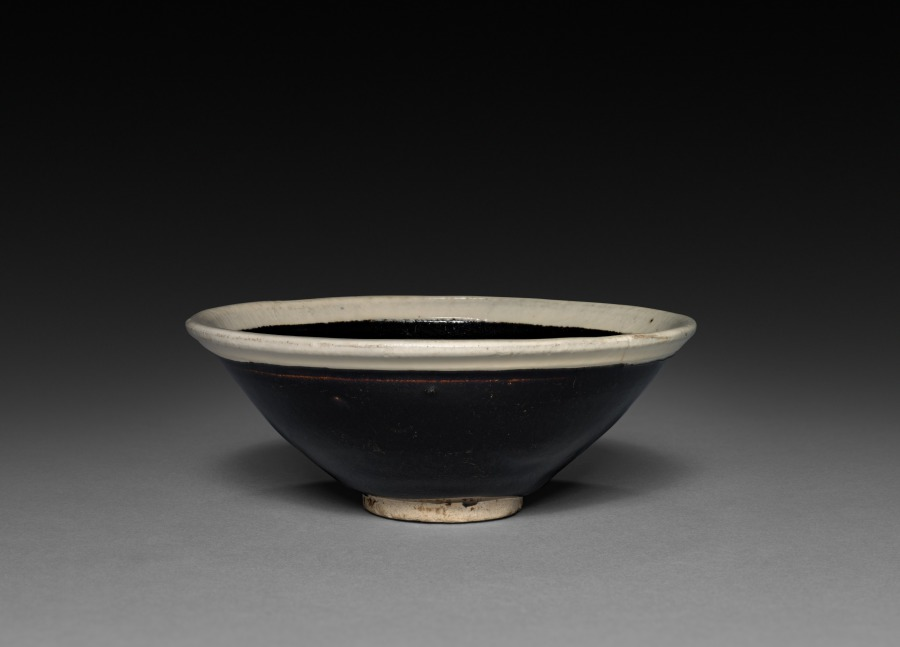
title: Tea Bowl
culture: China, Northern Song dynasty (960–1127)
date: 1100s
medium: stoneware, Northern black ware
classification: Ceramic